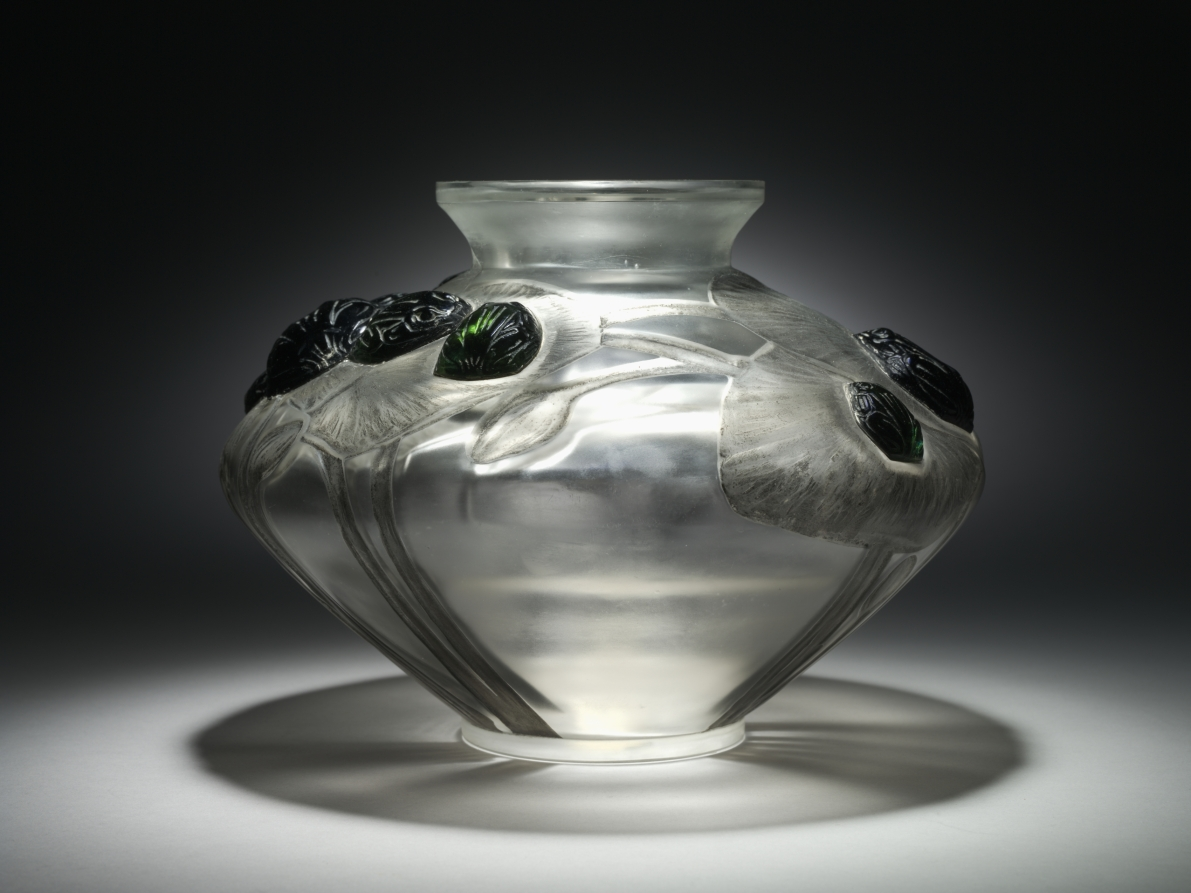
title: Frogs and Lily Pads (Grenouilles et Nénuphars) Vase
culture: France, 20th century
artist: René Lalique (French, 1860–1945)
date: 1909–12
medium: glass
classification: Glass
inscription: "R. Lalique"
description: This vase is an early example of French designer René Lalique's experimentation with producing artistic glass. Lalique combines applied, cast, and molded glass techniques to achieve an ethereal effect of a murky swamp, a typical Art Nouveau motif. Lily pads adorn the surface with green frogs perched on top.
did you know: René Lalique placed little sheets of metal foil behind the applied green frogs to reflect a dark green tint back to the viewer.